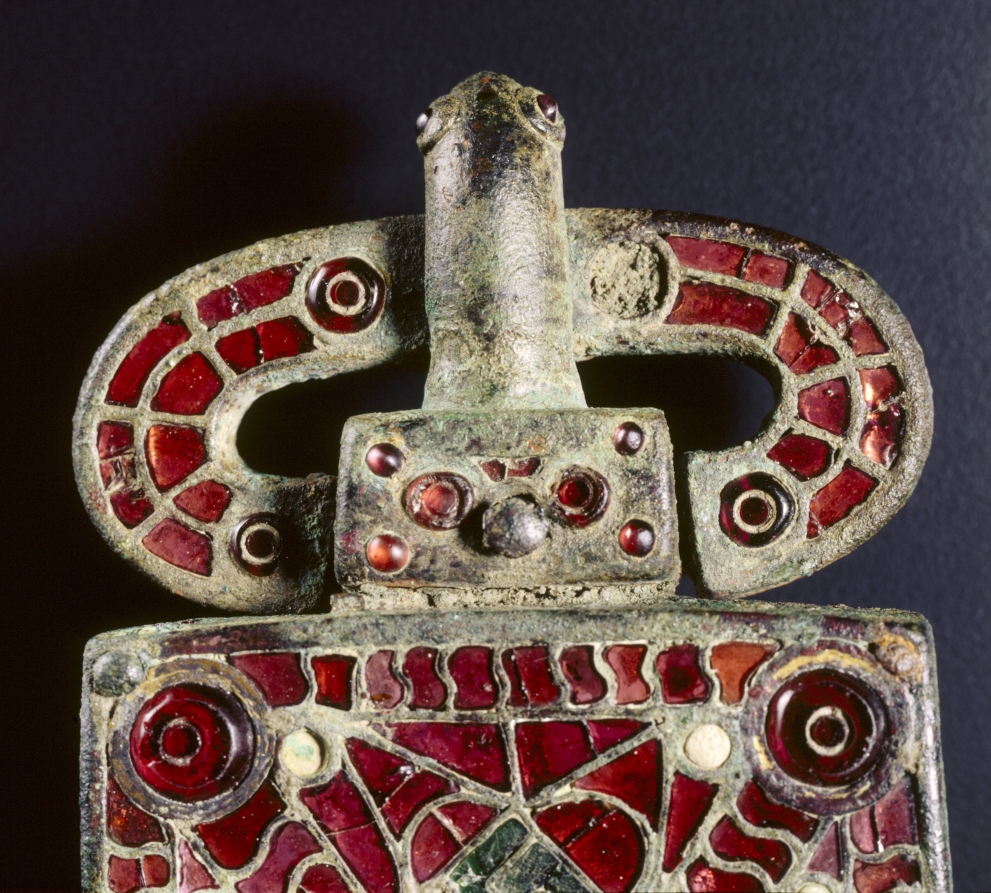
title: Belt Buckle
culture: Visigothic, Spain, Migration Period, 6th century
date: c. 525–560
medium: bronze with garnets, glass, mother of pearl, gold foil, traces of gilding; bronze and glass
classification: Jewelry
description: The art of the European Migration Period (3rd-7th centuries AD) is almost exclusively one of personal adornment-a portable art that followed men and women to their graves. Belt buckles with large rectangular attachment plates have been discovered in cemeteries across the Iberian Peninsula-now occupied by Spain and Portugal-from the period of Visigothic occupation (about AD 412-711). Their decoration varies. Finer examples, like this one, are distinguished by brilliantly inlaid semi-precious stones and colored glass. Garnets were especially prized in Visigothic society for use in cloisonné jewelry. The technique involved the fitting of carefully cut pieces of polished garnet into an intricate grid of compartments, or cloisons. This buckle is so densely inlaid with garnets that it presents a virtual "carpet" of red to the eye. These large Visigothic buckles are strikingly uniform in shape yet endlessly varied in surface design, perhaps a sign that they expressed the personal identities of their original owners. Grave excavations have shown that belt buckles of this type were made for women.